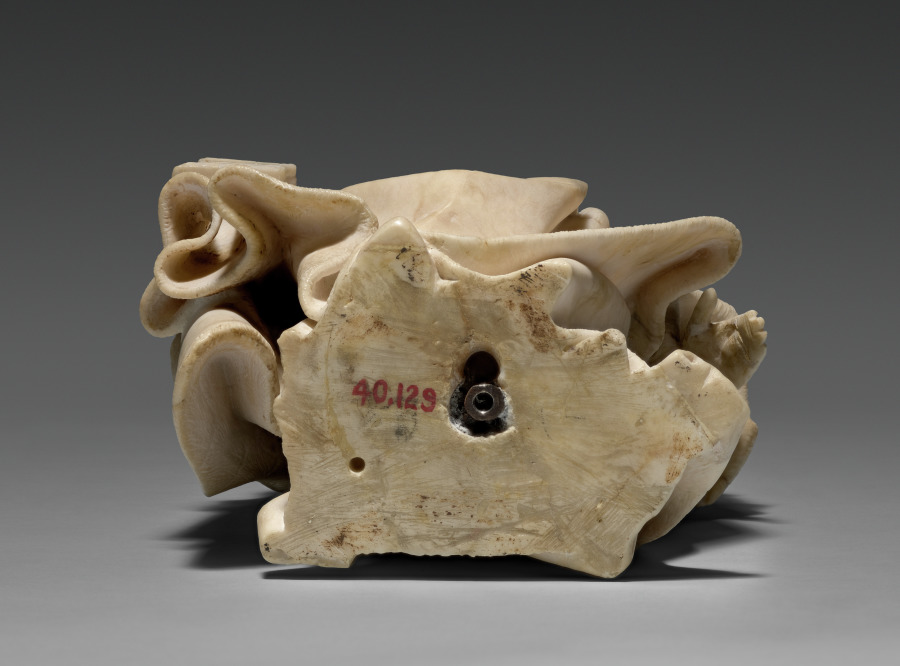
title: Mourner from the Tomb of John the Fearless and Margaret of Bavaria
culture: Spanish, Burgundy, Dijon, 15th century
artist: Jean de la Huerta (Spanish, active Burgundy, 1431–62)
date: 1443–45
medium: salins alabaster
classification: Sculpture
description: This monklike figure has a variously textured monochrome surface. Alabaster’s softness made it easy to carve details like the fabric and fur of the mourner’s robe and the codex pages in his hand. This is one of 40 mourners from an elaborate funeral procession beneath an intricately carved alabaster arcade. This mourner comes from the monastery of Champmol near Dijon, which became a primary burial place for Burgundian dukes. The sculpture was part of the tomb of John the Fearless (1371–1419), commissioned by his son Philip the Good (1396–1467), modeled after the earlier monument for Philip the Bold.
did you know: A plaster cast of this mourner adorns the Tomb of John the Fearless and Margaret of Bavaria in Dijon, France.